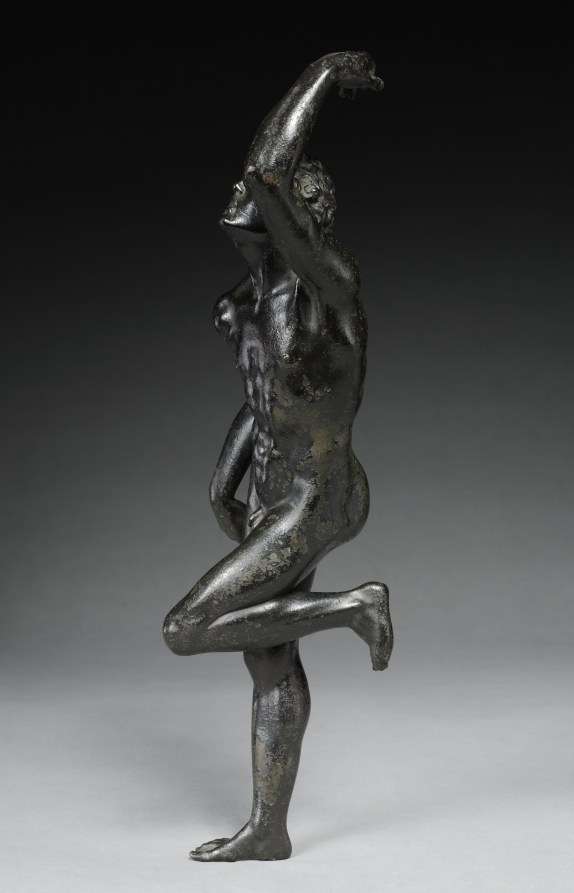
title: Saint Sebastian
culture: Germany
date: 1600s or later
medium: bronze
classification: Sculpture